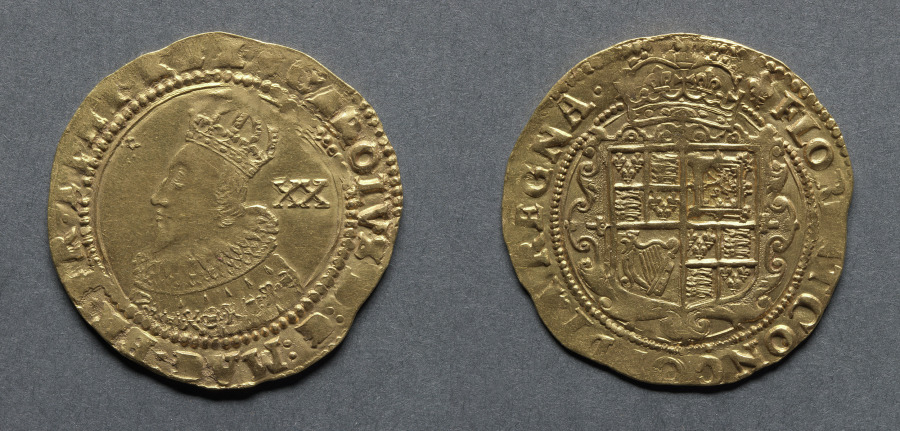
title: Unite: Charles I (obverse); Crowned Shield (reverse)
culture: England, Charles I, 1625-1649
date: 1625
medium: gold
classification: Coins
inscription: CAROLUS D G MAG BR FR ET HI REX. XX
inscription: FLORENT CONCORDIA REGNA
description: After ascending to the throne, Charles I ordered that the coinage should remain the same types and denominations as that of James I. Throughout all the troubles of his reign he did not alter the value of the gold coinage. Until the English Civil War started in 1642, the king's authority continued to rule the Tower mint. With the appointment of Sir John Coniers as Lieutenant of the Tower, control of the mint passed into the hands of the Parliamentary party, which continued to strike coins bearing the king's effigy and titles. To keep the Royalist party supplied with money, Charles opened other mints at York, Aberystwyth, Shrewsbury, Oxford, Bristol, Truro, Exeter, Weymouth, and Chester, while a mint operated near Worcester in 1646. During the civil war mints operated in the besieged towns of Carlisle, Colchester, Newark, Pontefract, and Scarborough, and produced a number of irregularly shaped coins of many odd denominations hastily struck from local domestic plate.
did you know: The gold unite was valued at 20 shillings, the roman numeral XX can be seen on the obverse.